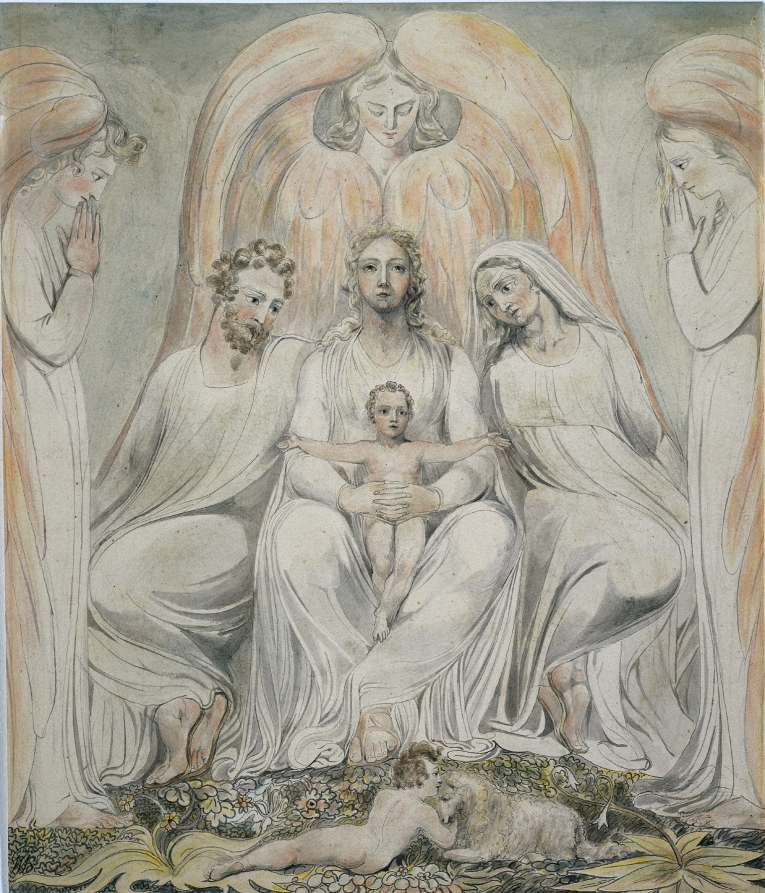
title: The Holy Family (Christ in the Lap of Truth)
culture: England, London, 18th century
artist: William Blake (British, 1757–1827)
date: c. 1805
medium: black, gray, and brown ink applied with pen and point of brush; gray, pink, yellow, and green wash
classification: Drawing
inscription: signed, lower right, in black ink: [artist's monogram:8 inv / wb]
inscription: verso, upper center, in graphite: G [collector's mark? (not in Lugt)]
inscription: across bottom, in graphite: no. 9 [S?]ingle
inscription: across bottom, in graphite: The Holy Family / Jesus-Mary-Joseph-Elizabeth + St. John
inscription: lower center, in graphite: 50/ [7?]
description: Although he rejected institutionalized religion, Blake was intensely spiritual, and much of his art was inspired by a highly personal reading of the Bible or by literature based upon it, such as John Milton’s Paradise Lost (1667). The Virgin Mary is centered in this highly stylized composition. Upon her lap she clasps the infant Christ whose outstretched arms foreshadow the Crucifixion. The Mother and Child are flanked by Saint Joseph on the left, and Saint Anne (the Virgin’s mother), on the right. Below, Saint John the Baptist, who foretold Christ’s death and resurrection, plays with a lamb.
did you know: This drawing was first owned by Thomas Butts, an English civil servant who became William Blake's most important patron and supporter for about two decades.